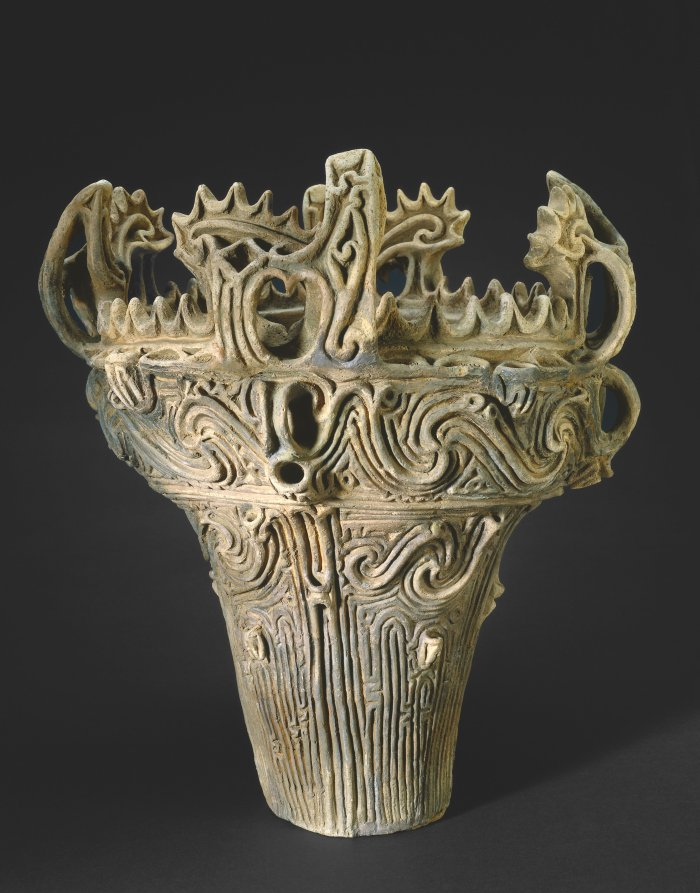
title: Fire-flame Cooking Vessel (Ka'en Doki)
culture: Japan, Jōmon period (c. 10,500–300 BCE)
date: c. 2500 BCE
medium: Earthenware with carved and applied decoration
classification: Ceramic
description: Archaeologists call this kind of vessel “fire flame,” ka’en in Japanese, because its top resembles flames. No one knows why the design was made or what it actually represents. This example is remarkable for the amount that is original. It was recently determined that a bottom from a different vessel was used during its reconstruction in the 1900s, creating a false impression of its intended scale; it would have initially been about four inches shorter. Since their lower portions were set into holes in the ground during use, bases of pots like this one often deteriorate and may be missing when they are excavated.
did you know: Scientifically tested residues from Jōmon vessels reveal that their makers consumed detoxified acorns.